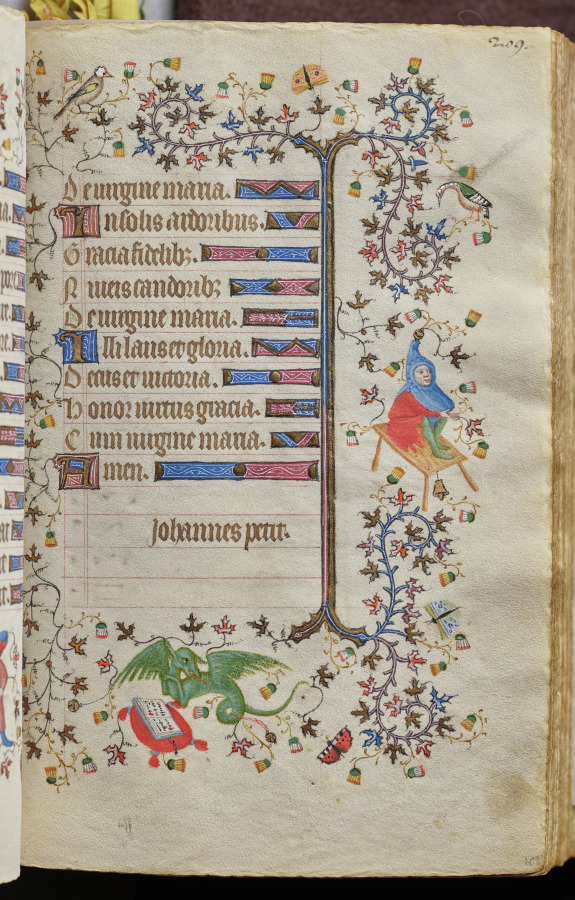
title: Hours of Charles the Noble, King of Navarre (1361-1425): fol. 105r, Text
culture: France, Paris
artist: Master of the Brussels Initials and Associates (French)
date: c. 1405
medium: ink, tempera, and gold on vellum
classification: Bound Volume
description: This precious volume was obviously highly prized by its owner, the French-born King of Navarre, who had his coat of arms painted on no less than twenty folios. Rather than directly commissioning this manuscript from a specific workshop, it seems that Charles the Noble acquired his book of hours -- perhaps ready-made for the luxury market -- while on a trip to Paris in 1404-05. A collaborative effort, six painting styles are evidenced within the pages of this codex, those of two Italians, two Frenchmen, and two Netherlanders. The painter who was responsible for the planning and decoration of the book, and who produced seventeen of the large miniatures, was a Bolognese artist known as the Master of the Brussels Initials. His principal assistant, responsible for most of the borders, was a Florentine who signed his name "Zecho" da Firenze on folio 208 verso.